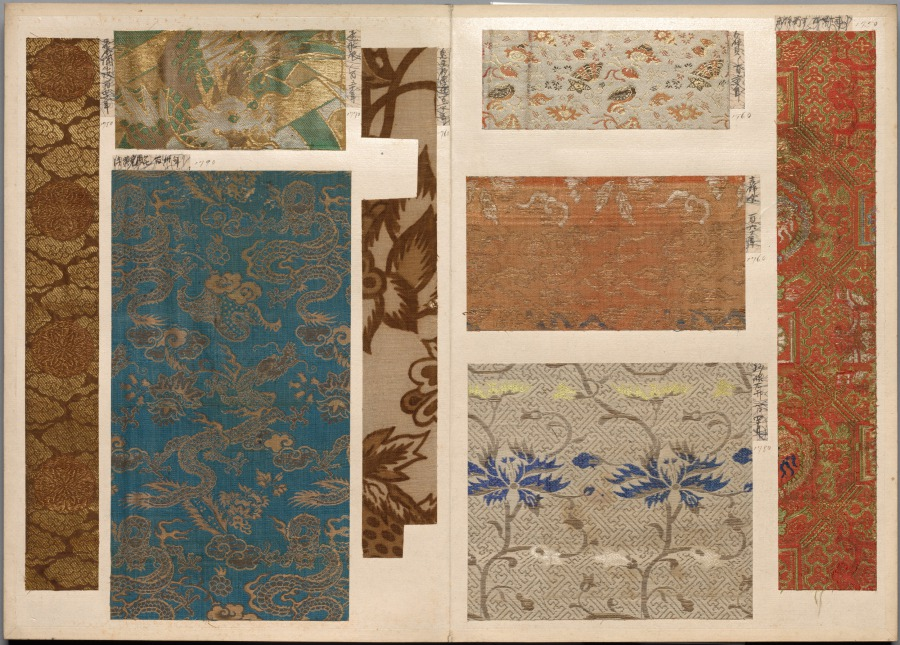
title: Album of Textile Samples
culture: Japan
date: 1790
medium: silk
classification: Textile